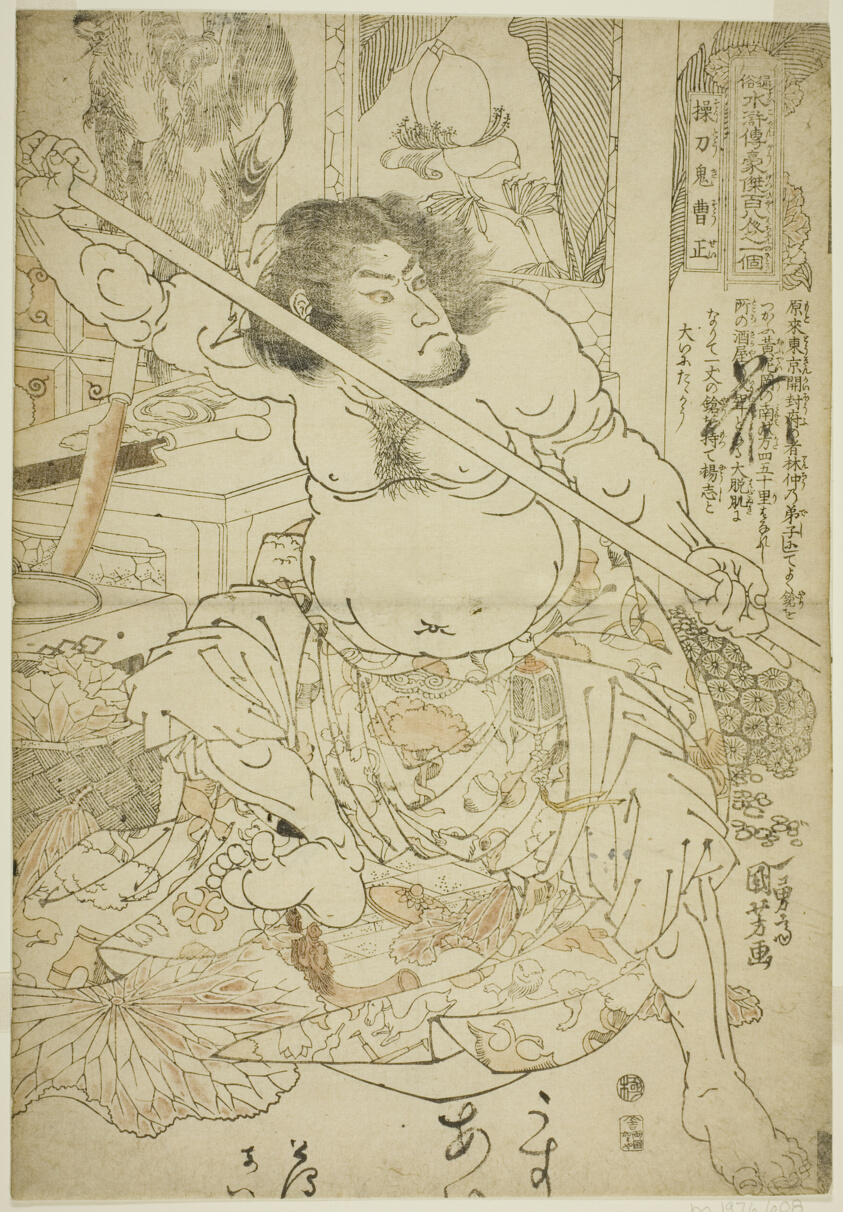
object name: Print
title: Cao Zheng (Sotoki Sosei), from the series "One Hundred and Eight Heroes of the Popular Water Margin (Tsuzoku Suikoden goketsu hyakuhachinin no hitori)"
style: Japanese (culture or style)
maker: Utagawa Kuniyoshi (Japanese, 1797-1861)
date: c. 1827/30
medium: Color woodblock print; oban, keyblock proof impression with light color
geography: Japan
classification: woodblock print; print; asian art